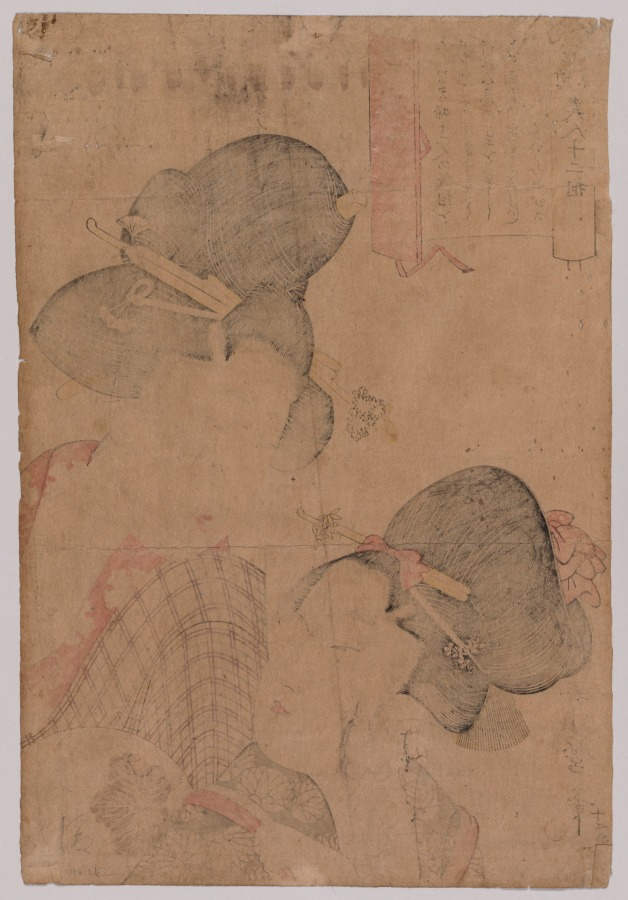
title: Two Courtesans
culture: Japan, Edo period (1615–1868)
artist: Kitagawa Utamaro (Japanese, c. 1754–1806)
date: 1753–1806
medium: color woodblock print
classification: Print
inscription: Signature: Utamaro fude